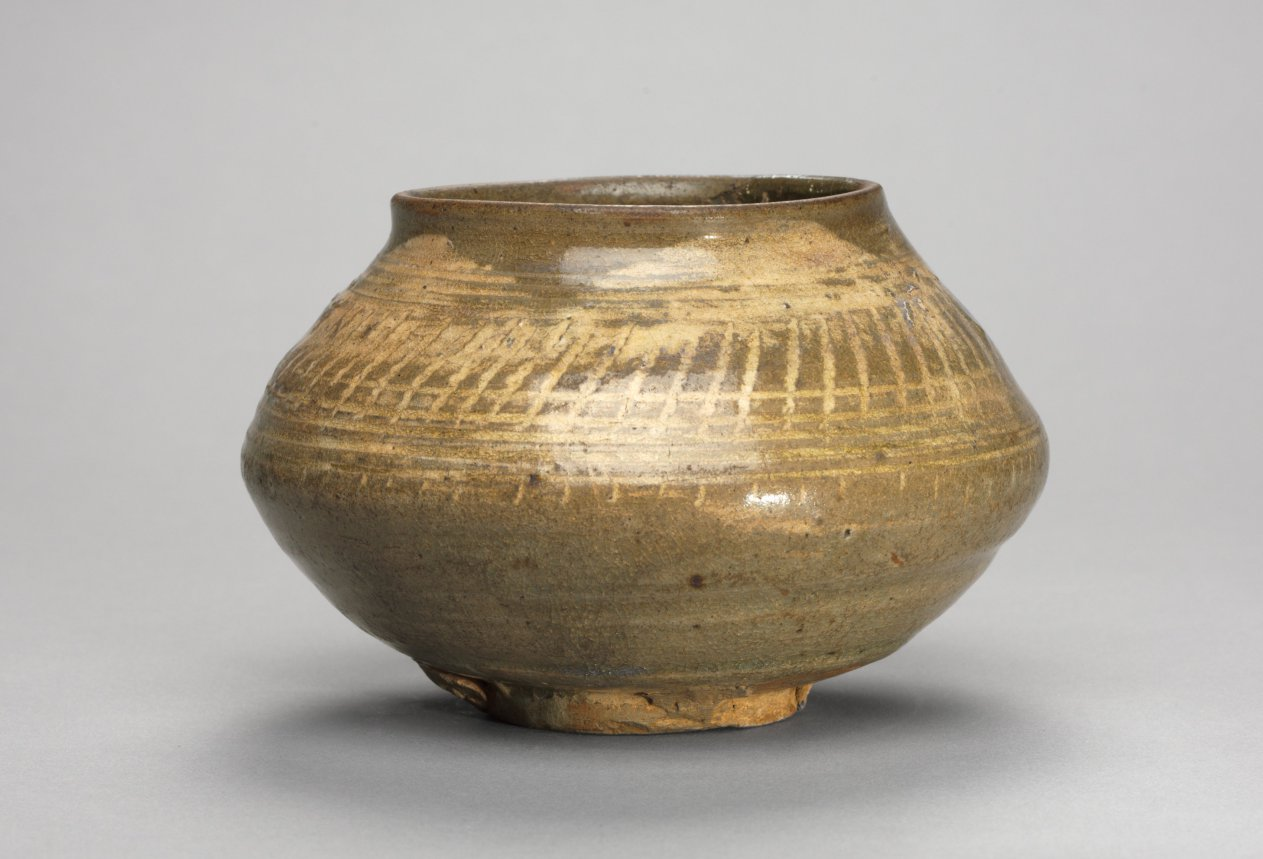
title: Tea Caddy with Stamped Floral Decoration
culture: Korea, Joseon dynasty (1392–1910)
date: 1600s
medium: glazed stoneware with stamped and incised inlaid white slip decoration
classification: Ceramic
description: This small jar may have been used as a container for powdered tea among Japanese tea drinkers. Possibly produced in one of the kilns established by the trading office (Waegwan) in Busan, southern Gyeongsang province, this type of tea ware may have sold to Japanese tea bowl collectors. According to a historical record dated to 1641, a trading boat shipped more than 14,000 tea bowls to Japan.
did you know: This tea caddy may have been produced in one of the kilns established and operated by the trading office (Waegwan) in Buan, southern Gyeongsang province, as an export item for Japanese tea ware collectors.